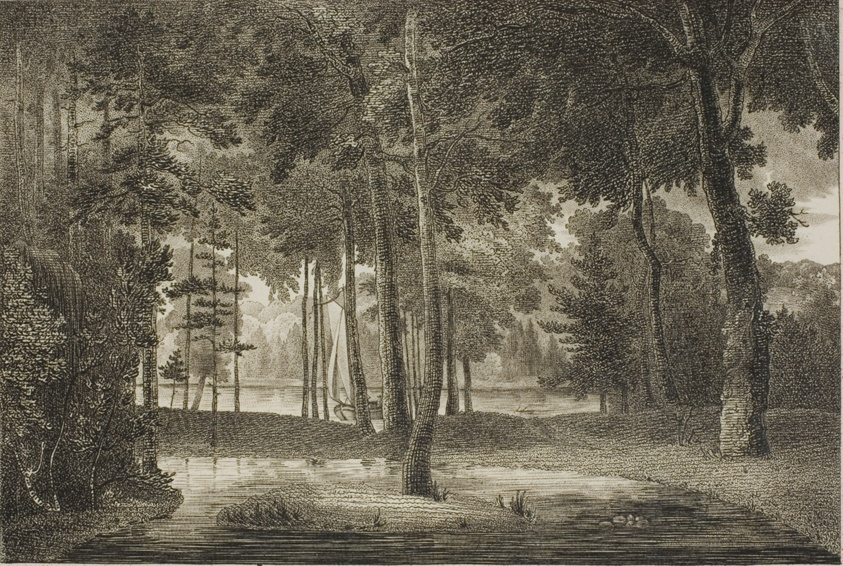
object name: Print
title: View from the Elysian Bower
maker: William Birch (American, 1755-1834)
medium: Engraving on ivory wove paper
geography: United States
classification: engraving; print; prints and drawing